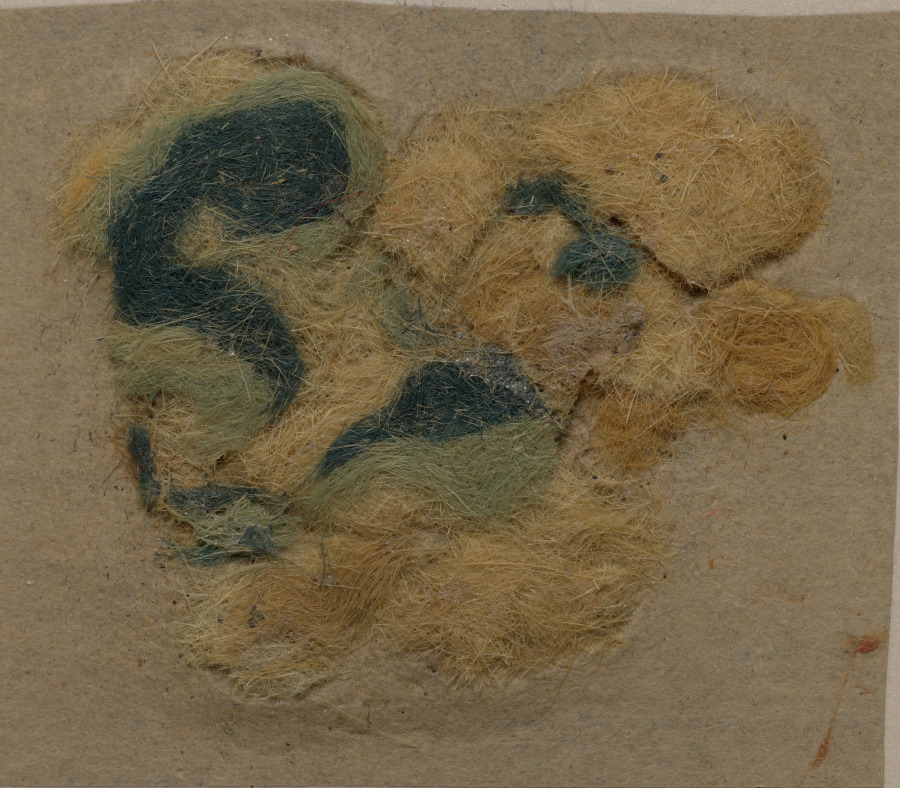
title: Fragment (Originally Piece of Felt)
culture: China or Japan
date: 700s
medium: felting: fiber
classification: Textile